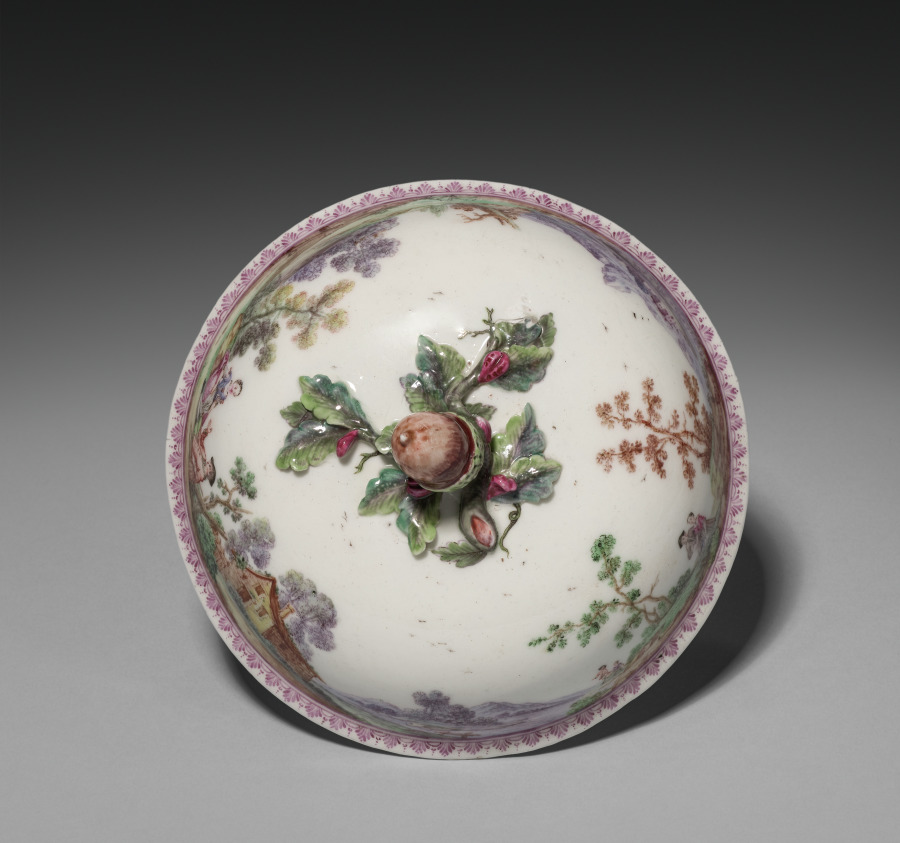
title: Cover for a Sugar Bowl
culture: France, Vincennes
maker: Vincennes Porcelain Manufactory (French, 1740–1756)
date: 1745–48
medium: soft-paste porcelain with enamel decoration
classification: Ceramic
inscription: In red on interior of lid: P.M. 16 4.8B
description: This covered bowl is one of the earliest surviving examples of Vincennes porcelain. Its decorations, particularly the lacy borders, show the influence of Meissen porcelain, but an individual note is struck in the extreme delicacy and colorful restraint of the painting of the landscape scenes.